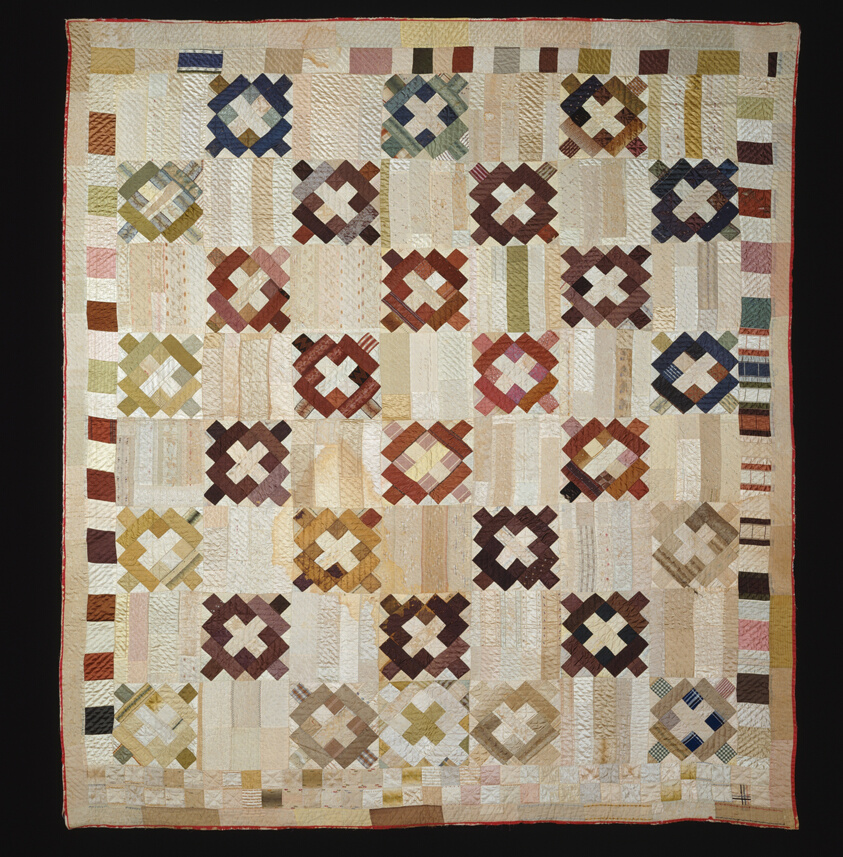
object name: Textile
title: Bedcover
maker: United States, New York, Ithaca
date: 1839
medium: Silk and cotton, variety of plain, satin and twill weaves, some with supplementary and/or self-patterning elements; pieced; quilted; edged with silk, warp-float faced satin weave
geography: United States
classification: textile; needlework - quilt